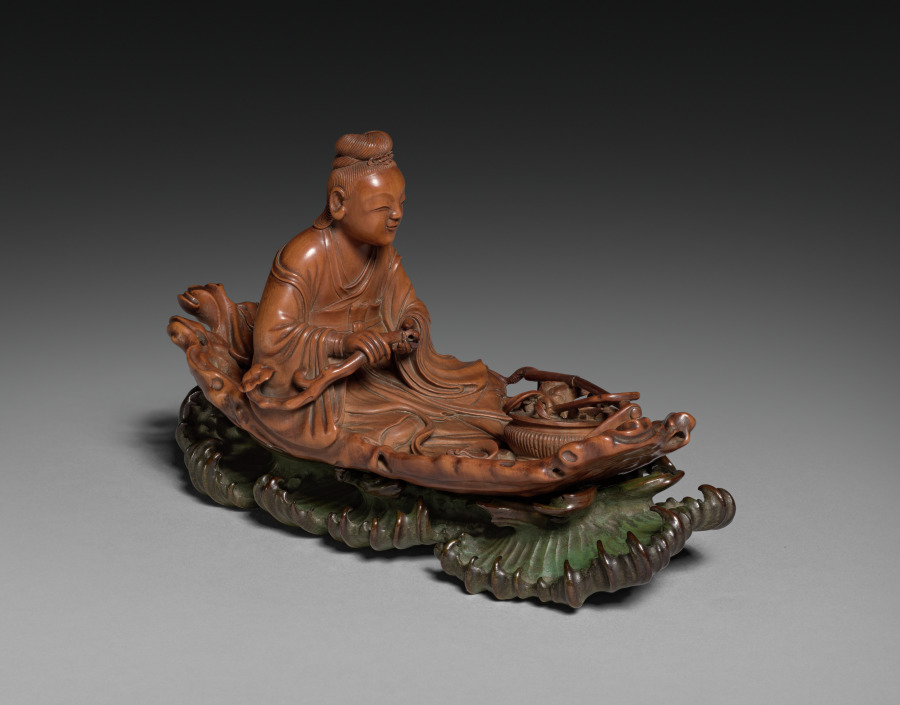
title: Figure of Daoist Immortal He Xiangu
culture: China, Qing dynasty (1644-1911)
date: 1700s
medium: Boxwood with colored ivory base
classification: Wood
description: He Xiangu is one of the Eight Immortals in the Daoist pantheon. She was thought to have been a real person who lived in the Tang dynasty, originally named He Qiong. As a teenager, she was instructed in a dream to eat powdered mica to become immune from death and to vow to remain unmarried. She did so and became an enlightened practitioner of Daoism. In this delicate carving, He Xiangu is placidly seated in a gnarled and knotty wooden raft amid green-tinted ivory waves. In front of her rests a bamboo basket filled with objects associated with Daoist immortality, while she holds a branch of lingzhi fungus.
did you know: Her basket contains plants and herbs used by Daoists for attempting to achieve immortality.